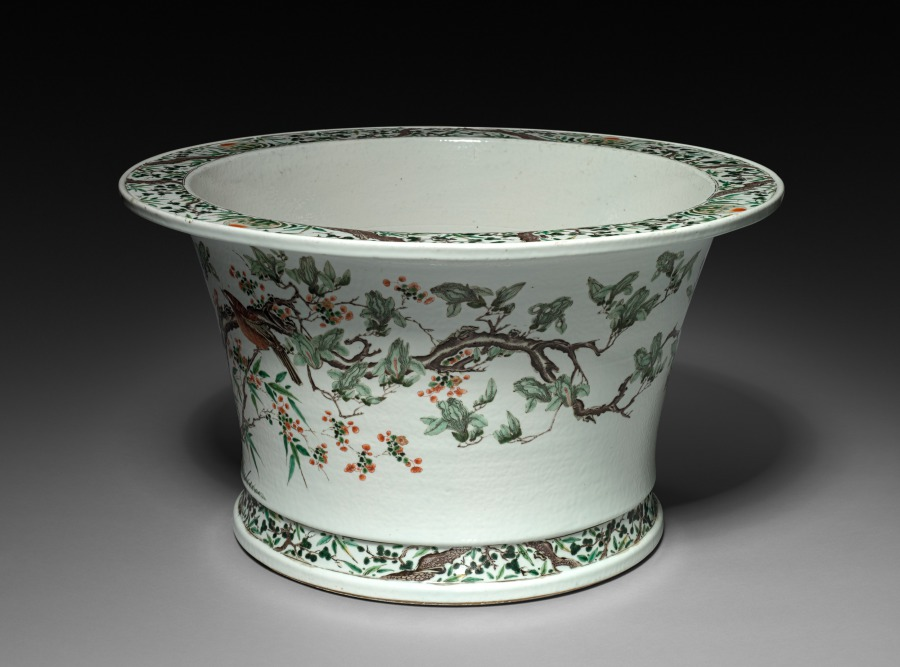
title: Jardiniere with Birds on Flowering Branches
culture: China, Jiangxi Province, Jingdezhen kilns, Qing dynasty (1644–1911), Kangxi reign (1661–1722)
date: 1662–1722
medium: porcelain with famille verte overglaze enamel decoration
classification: Ceramic